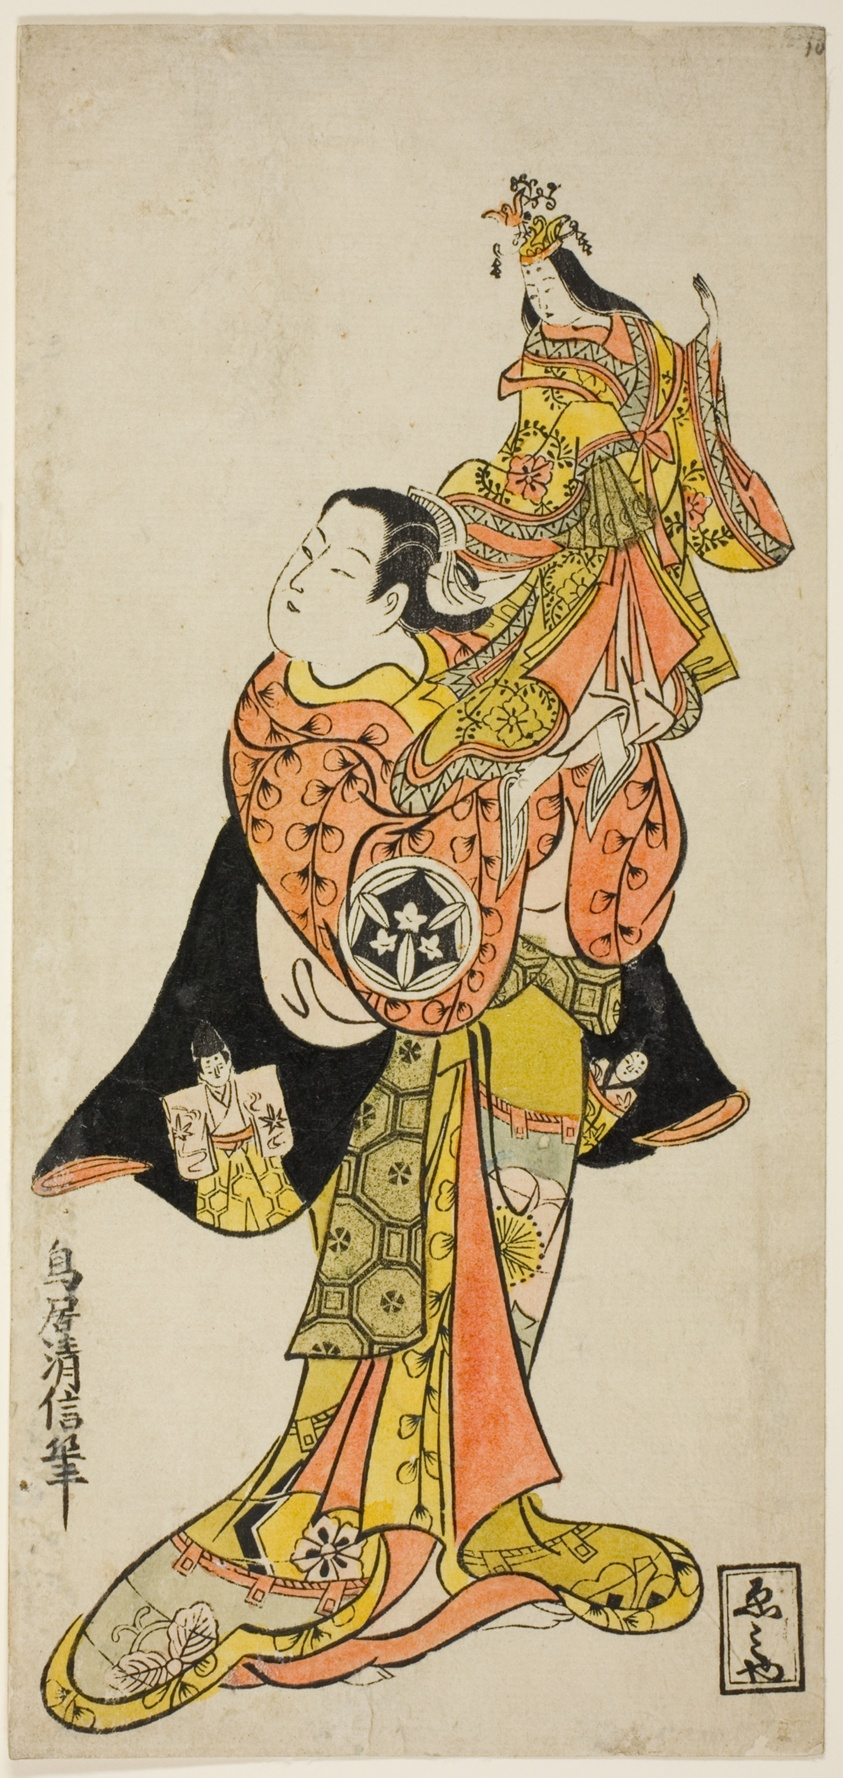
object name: Print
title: The Actor Yamashita Kinsaku holding a puppet of the Empress in the play "Diary Kept on a Journey by Sea to Izu (Funadama Izu Nikki)," performed at the Nakamura Theater in the first month, 1725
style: Japanese (culture or style)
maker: Torii Kiyonobu II (Japanese, active c. 1725–61)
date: 1725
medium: Hand-colored woodblock print; hosoban, urushi-e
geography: Japan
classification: woodblock print; print; asian art